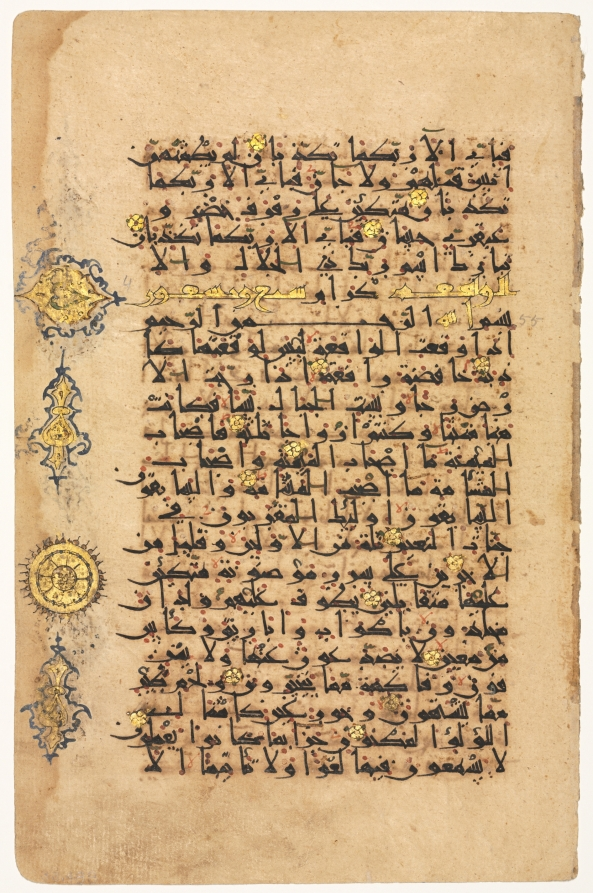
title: Page from a Qur'an (recto)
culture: Iran, Seljuq period (1037–1194)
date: 1100s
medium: ink, gold, and colors on paper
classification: Calligraphy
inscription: Sura al-Rahman (55: 73-78 end) and Sura al-Waqi'ah (56: 1-part 26). Script: Eastern Kufi (twenty-three lines to a page)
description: East Persian ornamental Kufic (a script used for Qur’an transcriptions) in black, red, and gold fill this page, which is additionally decorated with gold and blue medallions on its border. Twenty-three lines from the Qur’an’s Sura al-Rahman (The Compassionate, 55: 73–78) constitute the text.